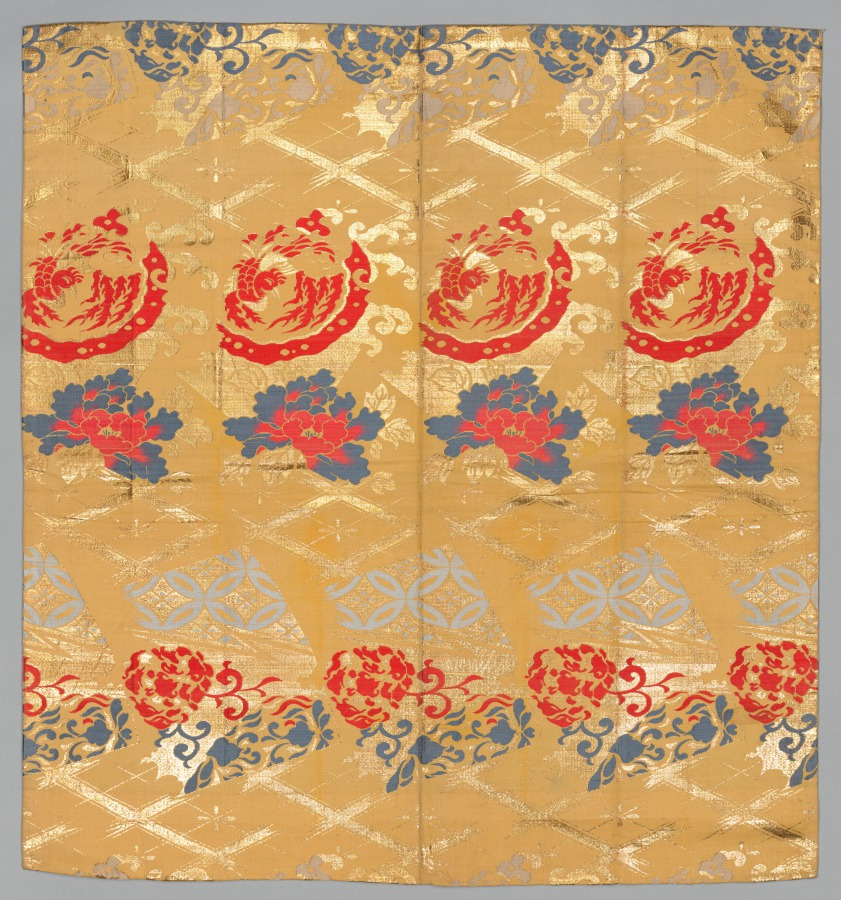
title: Fabric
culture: Japan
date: late 1800s-early 1900s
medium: Brocaded silk with metal thread weft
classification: Textile